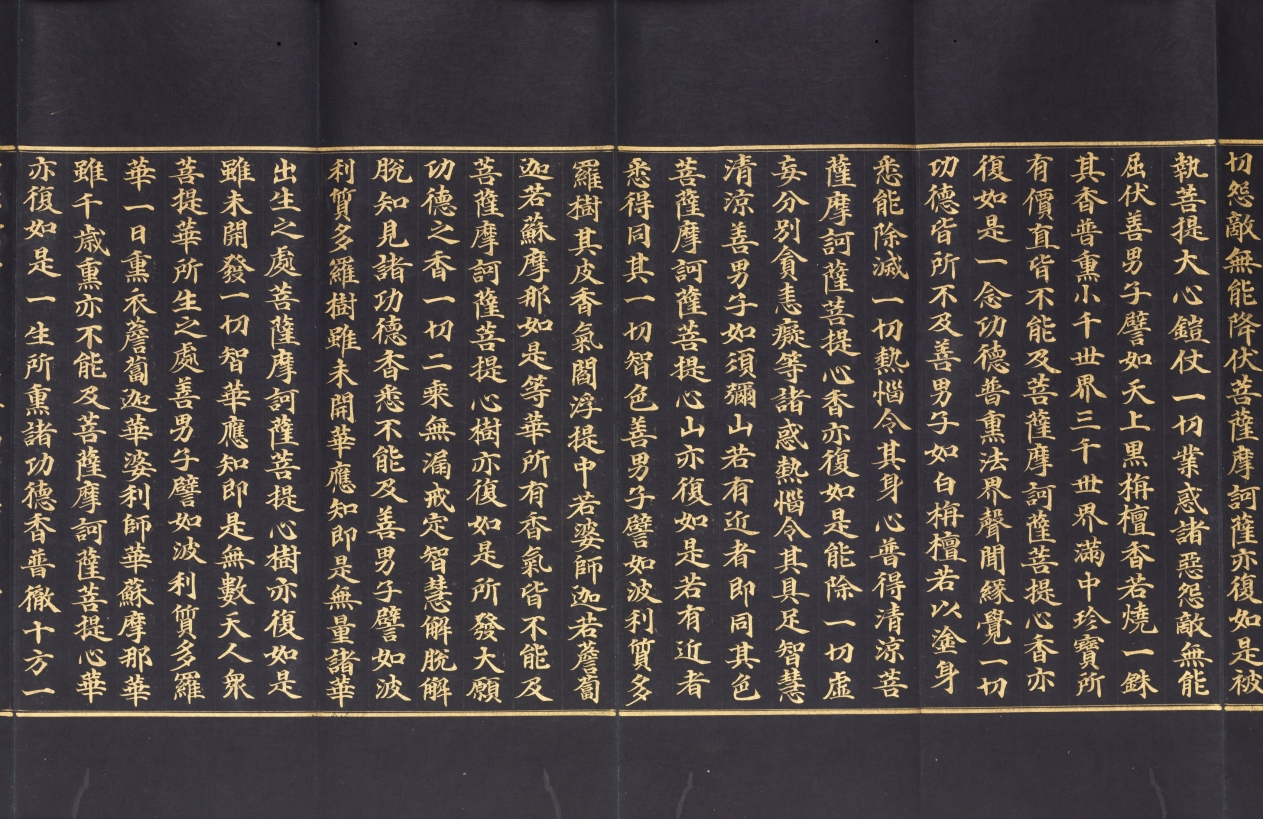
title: Avatamsaka Sutra No. 78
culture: Korea, Goryeo dynasty (918–1392)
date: 1300s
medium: Folded book with illustrated frontispiece; gold and silver on mulberry paper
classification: Bound Volume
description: This illuminated manuscript presents one part of the multivolume sacred text titled Avatamsaka (Flower Garland) sutra. Both the script and the image are rendered in gold ink on the smooth surface of the dark blue, indigo-dyed mulberry paper. This portion of the text, which reads from right to left, describes the encounter of the Buddha of the Future (Maitreya) and the young pilgrim Sudhana. The Buddha gives his words of wisdom to Sudhana, who asks questions about the path toward spiritual awakening. Mixed with ink and glue, the gold has a brilliance that strikingly reflects Sudhana’s ardent quest for understanding the way to reach enlightenment.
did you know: The pristine condition of this manuscript indicates that it was rarely used after its creation, revealing that the act of making a manuscript rather than reading it was the main religious goal.